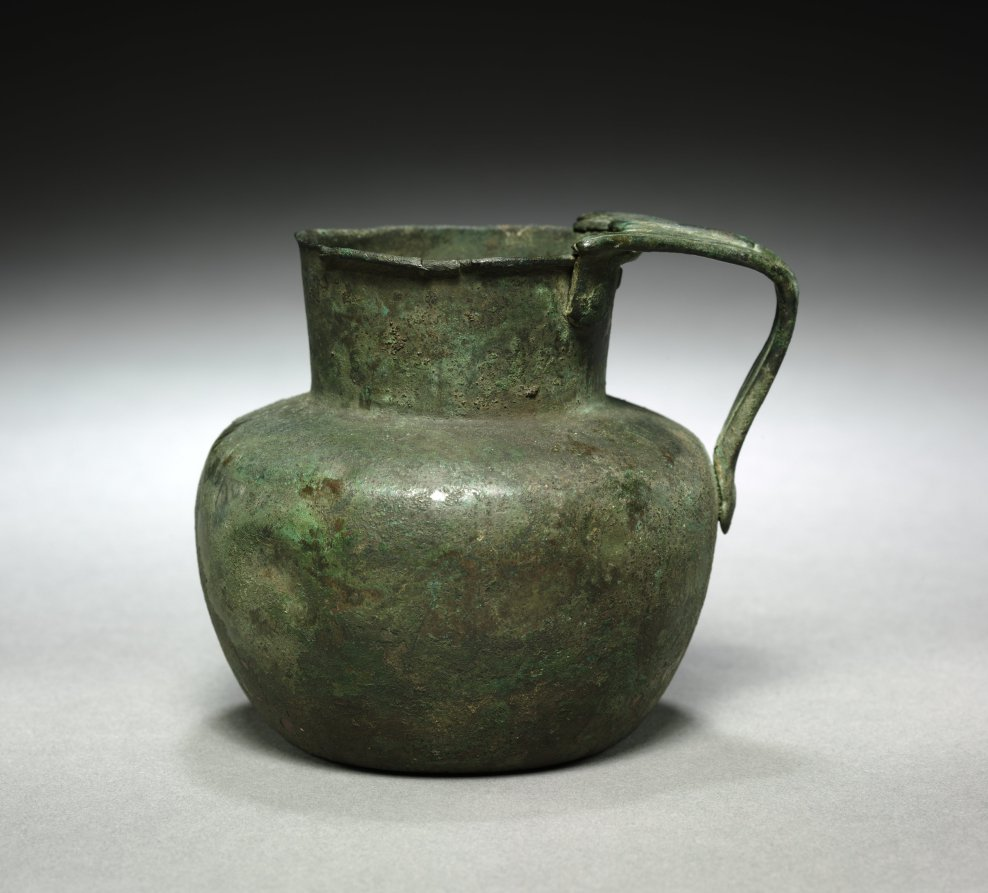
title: Jug or Pitcher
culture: Egypt, New Kingdom (1540–1069 BCE), Dynasties 18–19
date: 1350–1186 BCE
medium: bronze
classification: Vessels